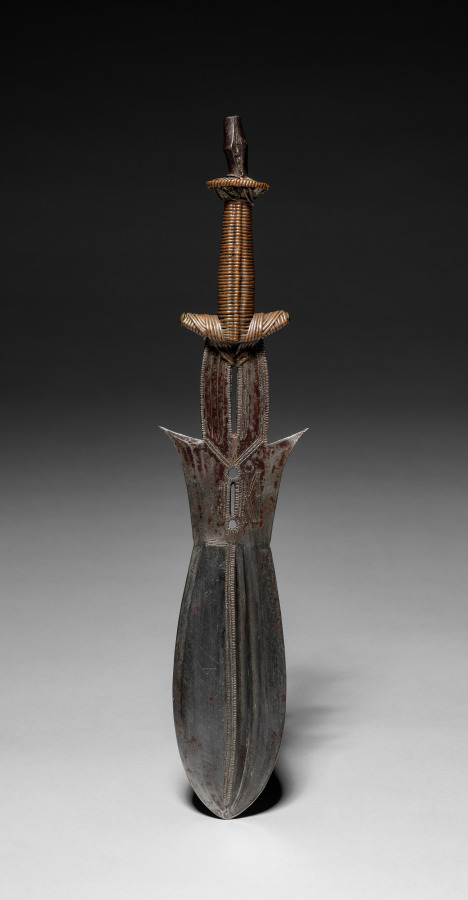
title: Knife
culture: Africa, Central Africa, Democratic Republic of the Congo, Ngbandi-style maker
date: c. 1900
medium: Iron and copper alloy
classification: Arms and Armor